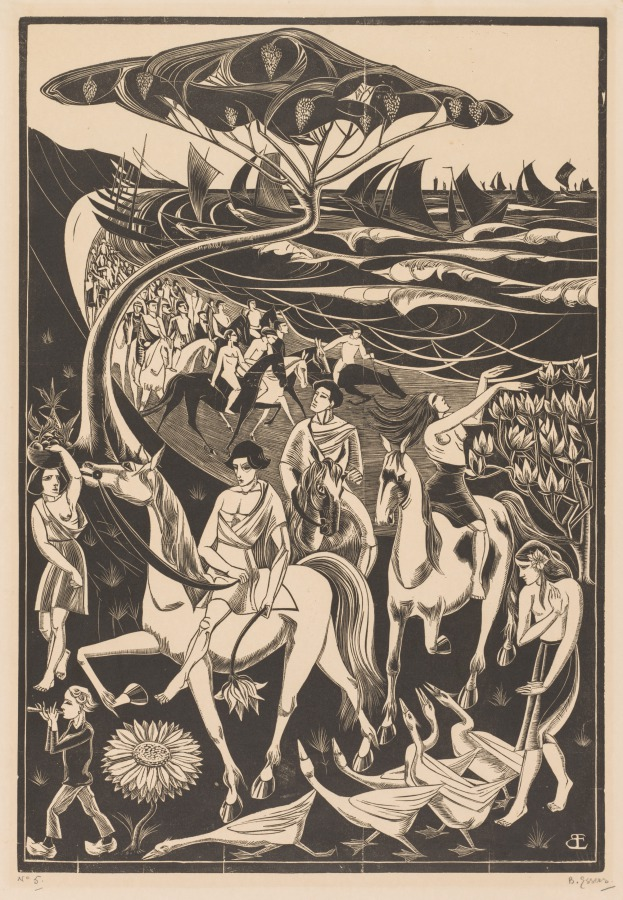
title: The Spring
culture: Netherlands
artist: Bernard Essers (Dutch, 1893–1945)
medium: woodcut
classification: Print